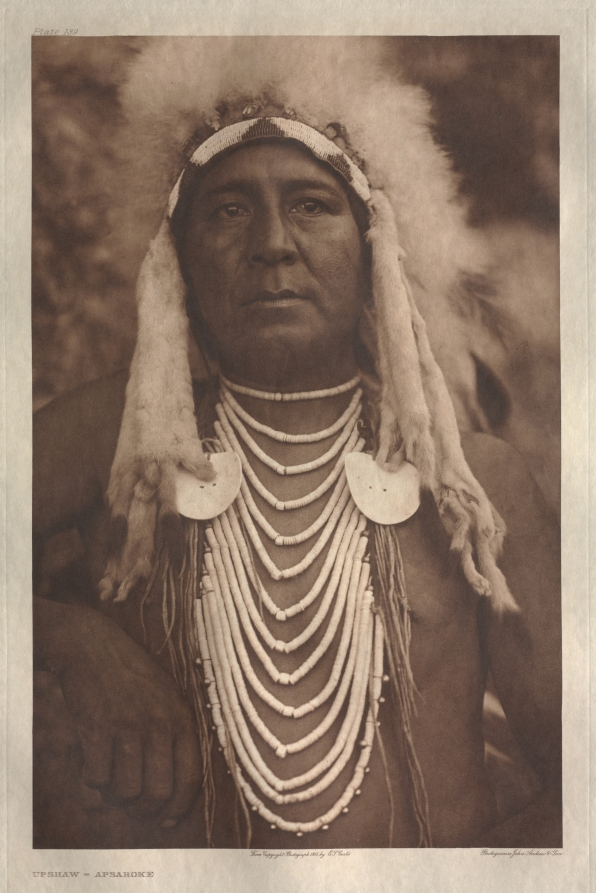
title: Portfolio IV, Plate 139: Upshaw--Apsaroke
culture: America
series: The North American Indian: being a series of Portfolios picturing and describing the Indians of the United States, the Dominion of Canada, and Alaska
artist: Edward S. Curtis (American, 1868–1952)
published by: The University Press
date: 1905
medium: photogravure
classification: Portfolio